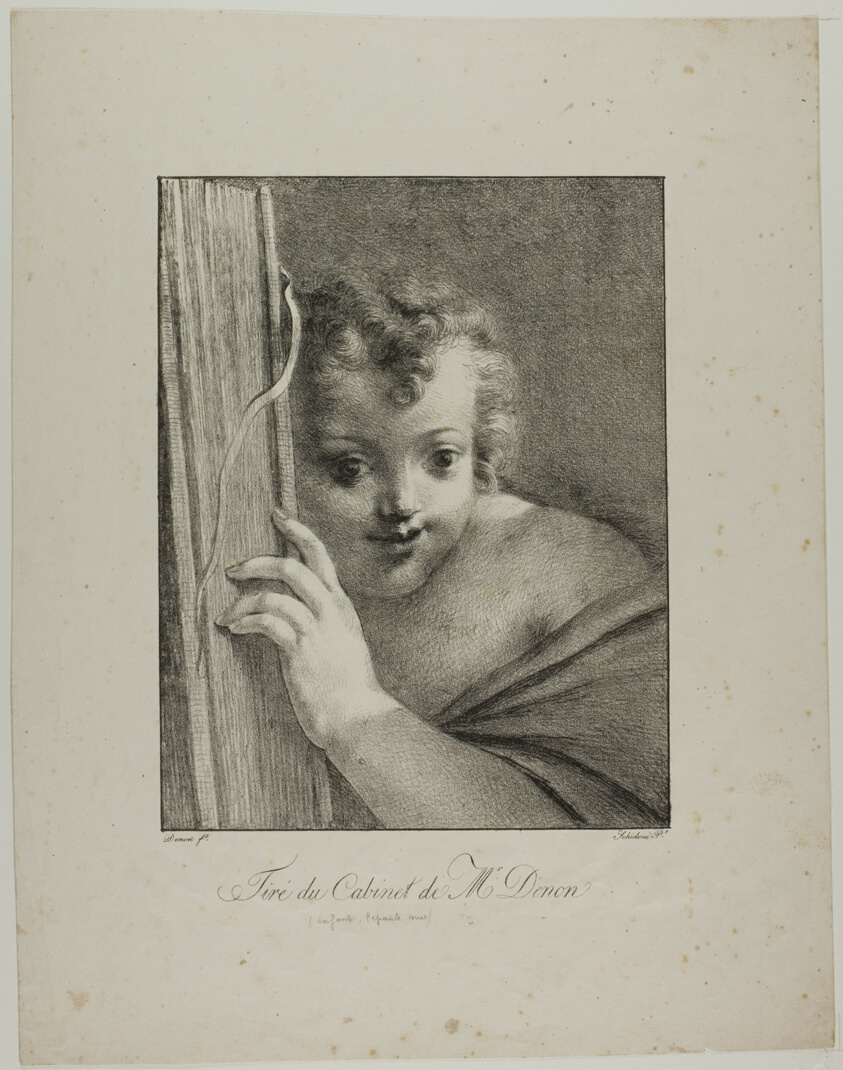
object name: Print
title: Cupid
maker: Dominique-Vivant Denon (French, 1747-1825); after Bartolomeo Schedoni (Italian, 1578-1615)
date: 1817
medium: Lithograph in black on cream wove paper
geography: France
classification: lithograph; print; prints and drawing